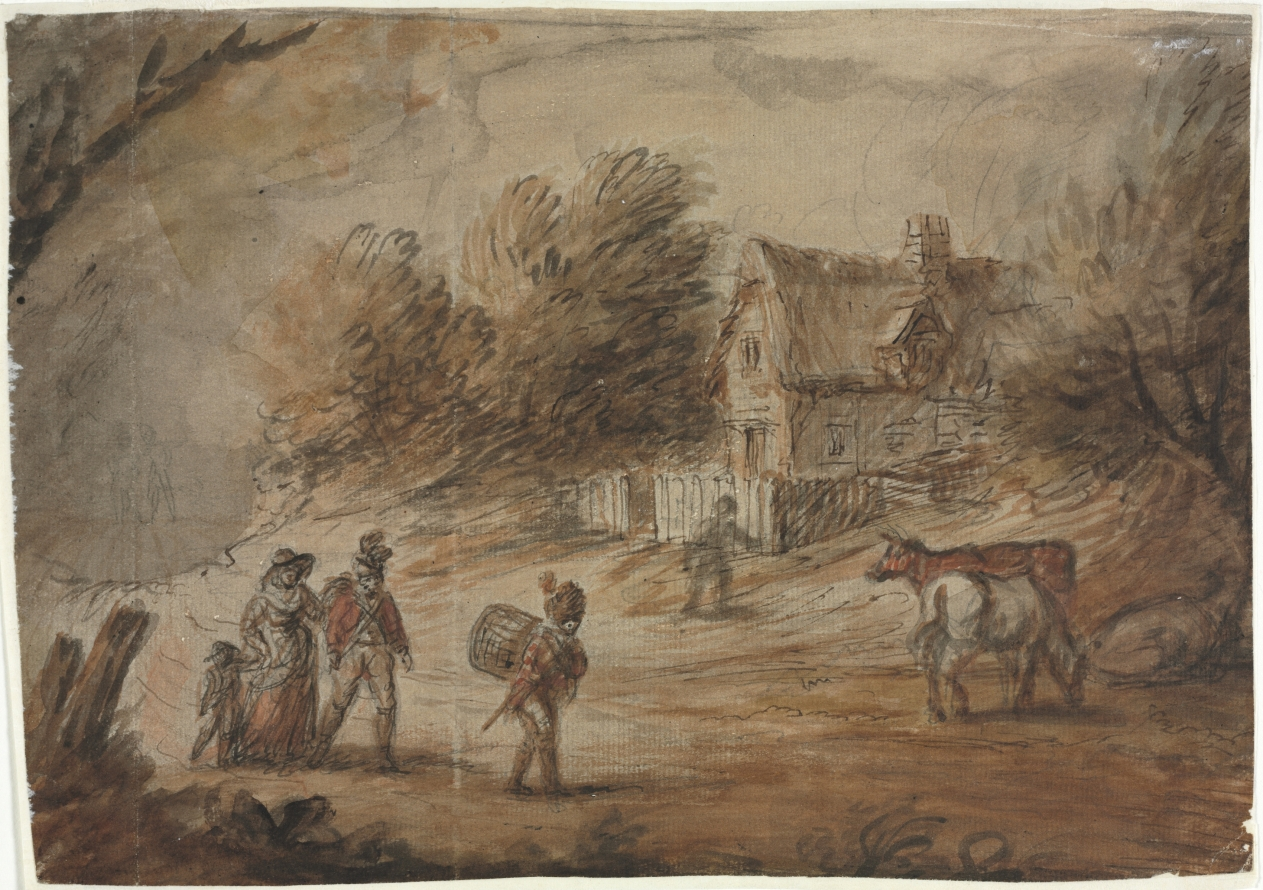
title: Country Scene with Soldiers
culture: England, 18th century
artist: Henry William Bunbury (British, 1750–1811)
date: c. 1775–1811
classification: Drawing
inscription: Watermark: G R/(image of shield with hunting horn surmounted by crowns)